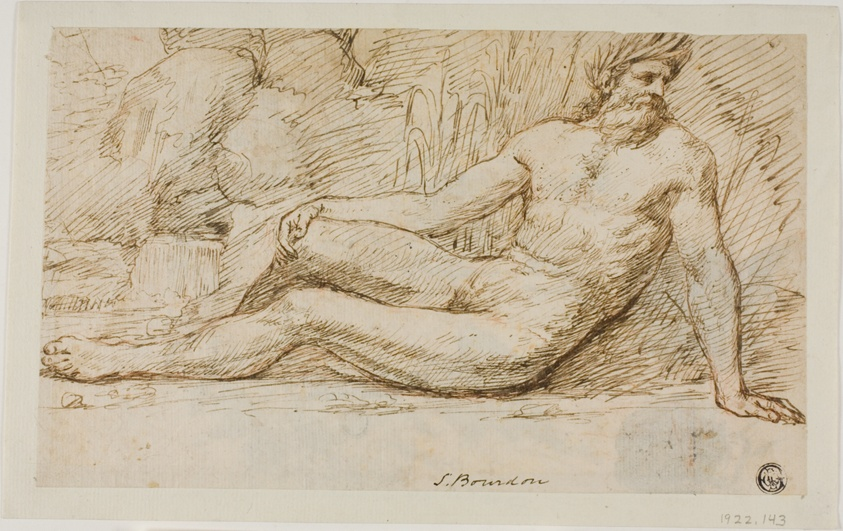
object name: Drawing and Watercolor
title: River God (recto); Sketches of Two Male Heads (verso)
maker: Recto attributed to Sébastien Bourdon (French, 1616-1671); Verso by Unknown Artist (French, 17th century)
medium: Pen and brown ink over red chalk (recto) and brush and black ink (verso) on ivory laid paper, edge mounted on off-white laid paper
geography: France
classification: drawings (visual works); prints and drawing